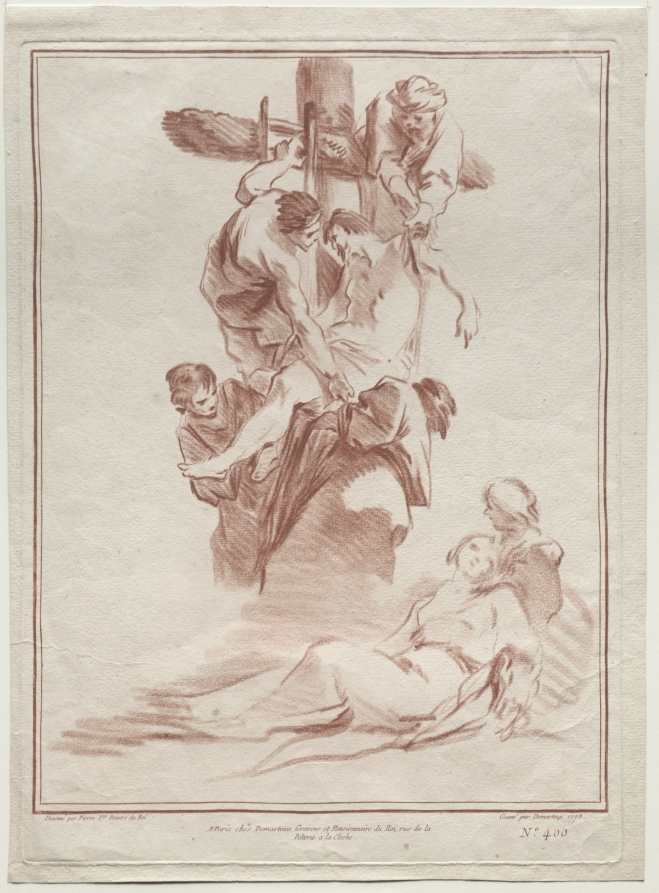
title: The Descent from the Cross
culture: France, 18th century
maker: after Jean-Baptiste-Marie Pierre (French, 1713–1789)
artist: Gilles Demarteau (French, 1722–1776)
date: 1773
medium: crayon manner etching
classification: Print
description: Gilles Demarteau was the first artist to master crayon-manner etching—the process seen here—which replicates the appearance of a red-chalk drawing. Rather than sketching with an etching needle, Demarteau used a tool called a roulette (a small, toothed wheel) to create tiny, regular dots that were then etched into the printing plate. The text along the lower margin of the image indicates that Demarteau’s print of the dramatic removal of Christ’s body from the cross reproduces a drawing by the well-known court painter to King Louis XV, Jean-Baptiste Marie Pierre. With prints like this, Demarteau took advantage of the popularity of chalk drawings in the 1700s, selling his prints to members of a growing middle class who were interested in acquiring the trappings of wealth.